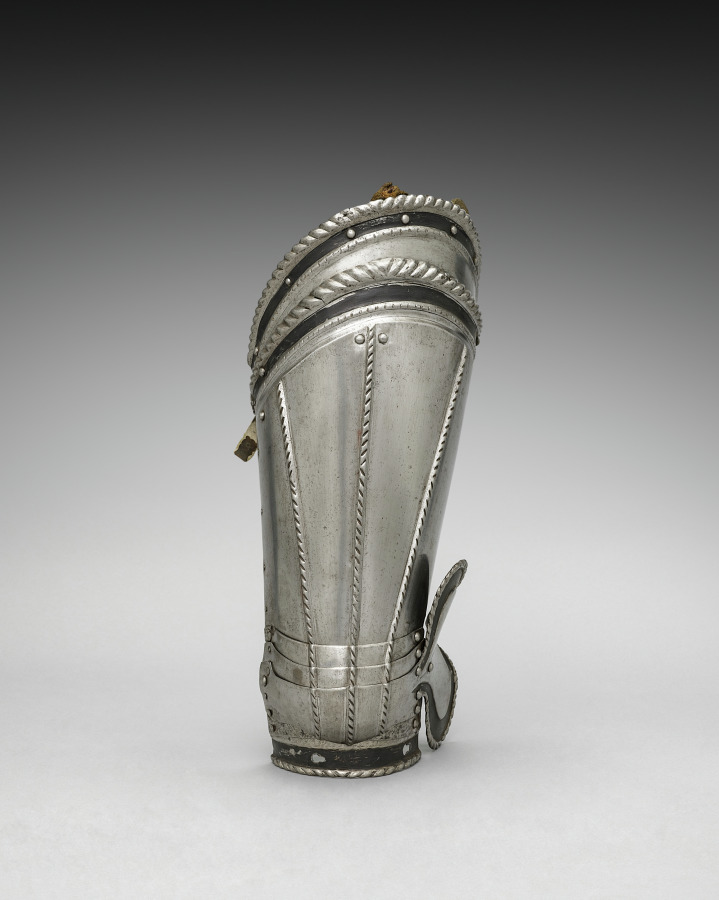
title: Left Cuisse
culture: Germany, 19th century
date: 1801–1900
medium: steel with black paint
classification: Arms and Armor